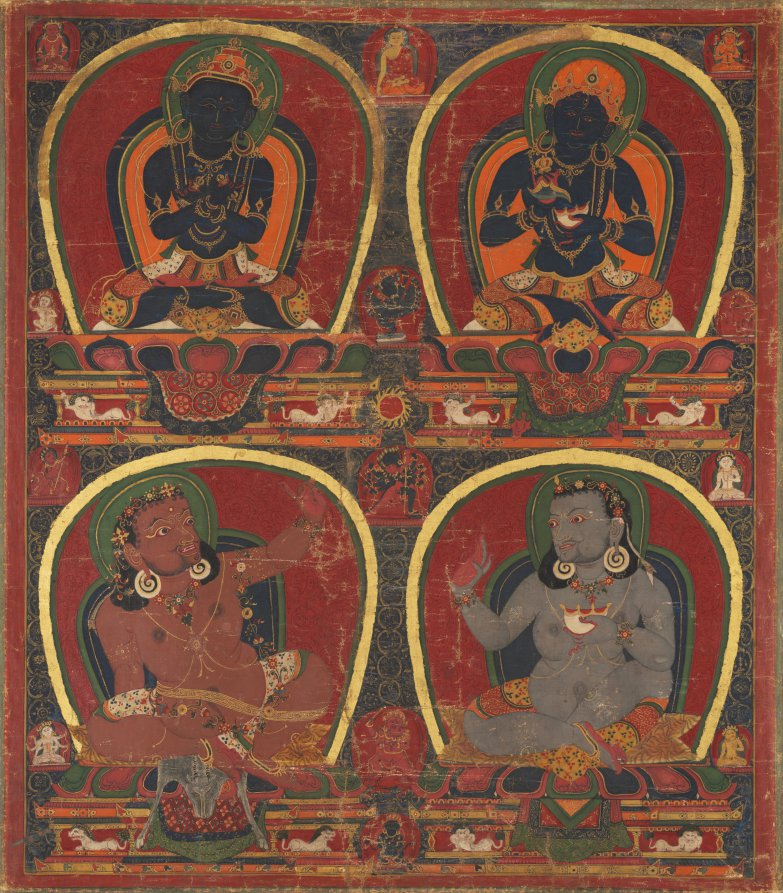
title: Vajradhara, Nairatmya, and mahasiddhas Virupa and Kanha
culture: Central Tibet, Ngor monastery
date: c. 1450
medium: Gum tempera and gold on cotton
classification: Painting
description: The first in a series depicting the masters who transmitted the teachings on how to reach enlightenment, this painting begins at the upper left with the dark blue Vajradhara, who represents the essence of all Buddhas. The female enlightened being Nairatmya is seated at the upper right. She transmitted the teachings to Virupa, the brown-skinned Indian yogi at the lower left, in a vision; his disciple Kanha is at the lower right.